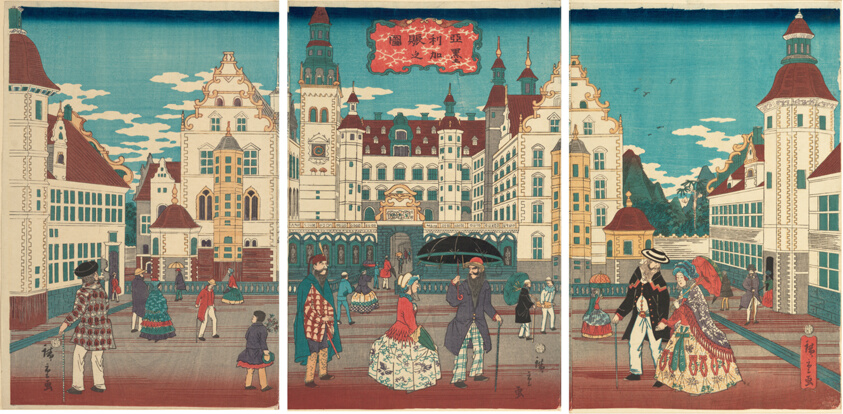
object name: Print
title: A Picture of Prosperity: America (Amerika shin no zu)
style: Japanese (culture or style)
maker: Utagawa Hiroshige II (Shigenobu) (Japanese, 1826-1869)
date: 1861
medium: Color woodblock print; oban triptych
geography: Japan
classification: woodblock print; print; asian art